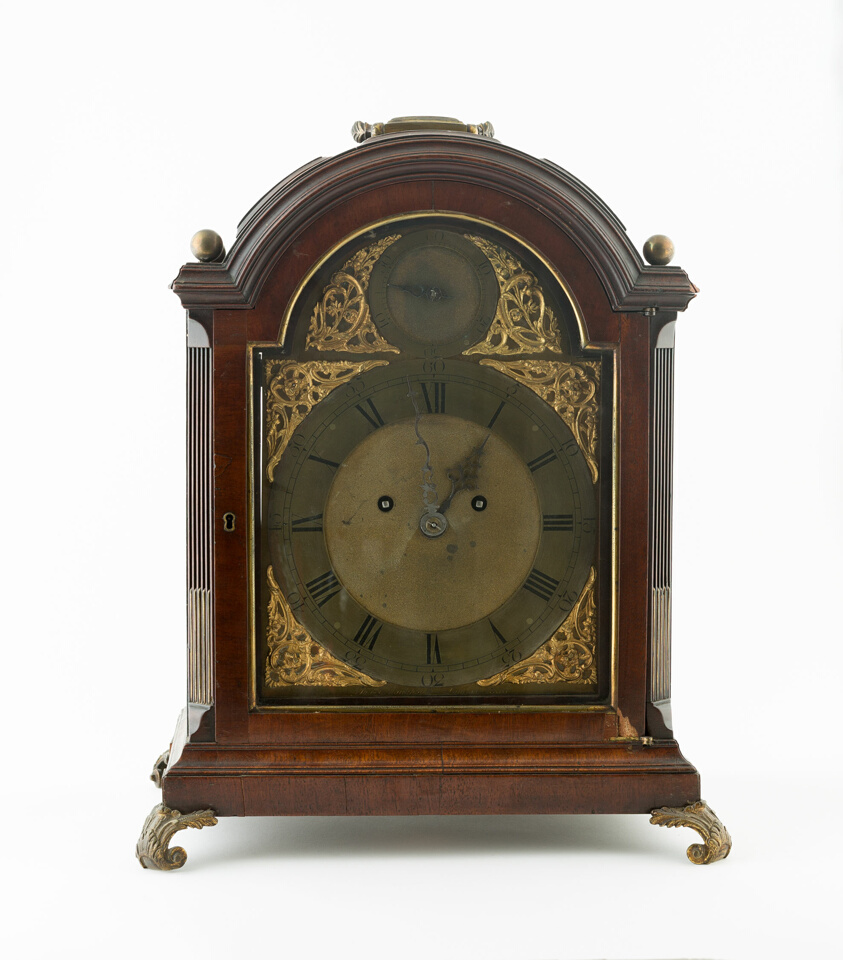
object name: Metalwork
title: Bracket Clock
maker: Thomas Monkhouse (English, active 18th century)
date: 1756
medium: Mahogany, gilt metal, and brass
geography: London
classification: clock; furniture; european decorative arts; metalwork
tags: furniture